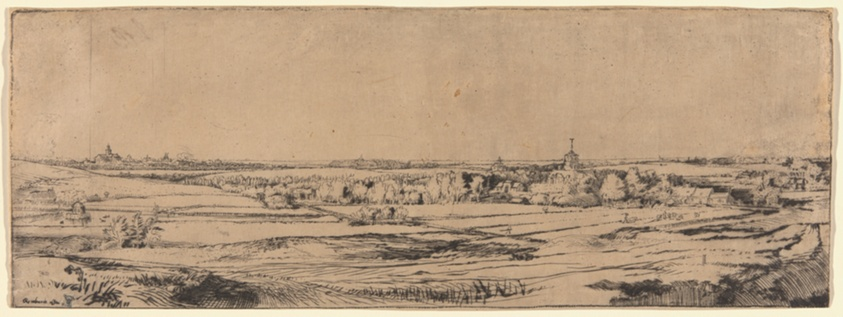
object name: Print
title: Panorama Near Bloemendaal Showing the Saxenburg Estate (The Goldweigher's Field)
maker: Rembrandt van Rijn (Dutch, 1606-1669)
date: 1651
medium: Etching and drypoint in black on cream Japanese paper (discolored to tan)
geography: Holland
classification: etching; print; prints and drawing; paper; drypoint